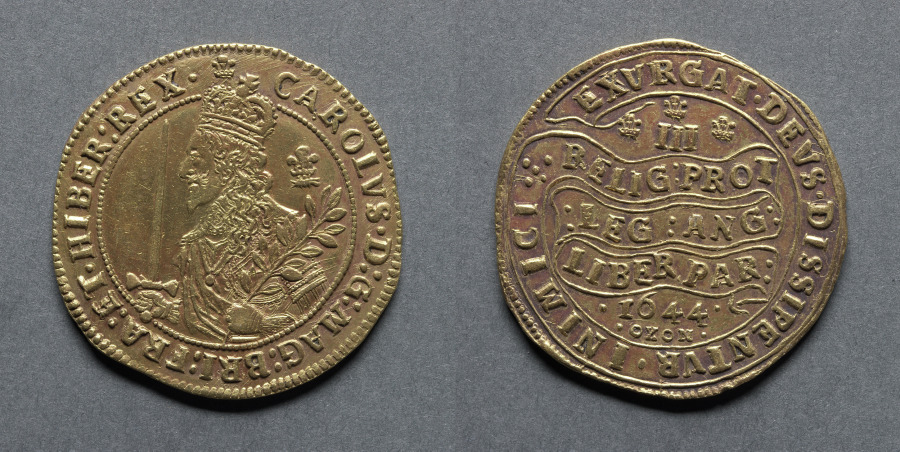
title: Triple Unite or Three Pound Piece: Charles I (obverse); Declaration on Scroll (reverse)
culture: England, Charles I, 1625-1649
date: 1644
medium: gold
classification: Coins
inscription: CAROLUS DG MAG BRIT FRAN ET HIBER REX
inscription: III RELIG PROT LEG ANG LIBER PAR 1644 OXON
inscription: EXURGAT DEUS DISSIPENTUR INIMICI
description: A more rare example of the Oxford Triple Unite, this piece is struck on a slightly smaller flan or planchet than 1969.195. Until his capture the King's headquarters remained at Oxford, and the OXON below the date denotes the place of striking. The king is shown at half length and is crowned. He holds a sword and olive branch with a plume behind him. On the reverse is Psalm 68, "Let God arise and His enemies be scattered."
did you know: The Triple Unite, valued at three pounds, was only produced during the English Civil War between 1642 and 1644.